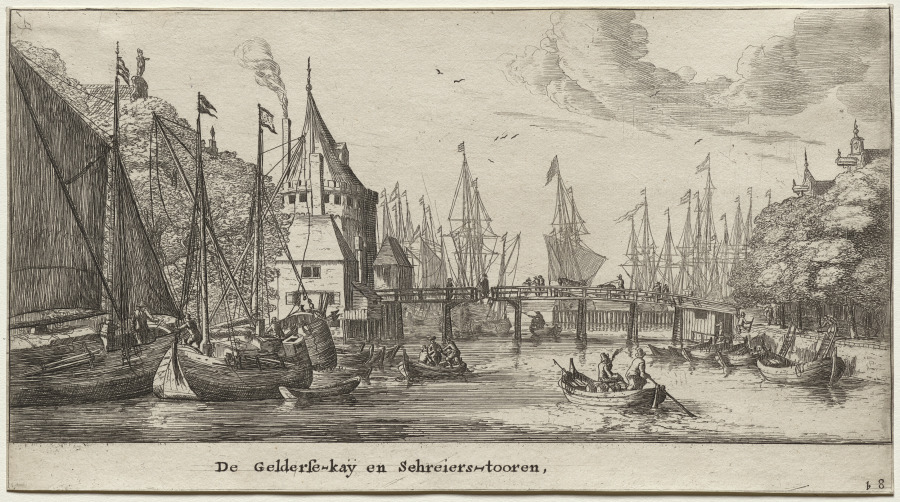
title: Various Ships and Views of Amsterdam (Verscheÿde Schepen en Gesichten van Amstelredam), Part II: The Geldersche Quai and Schreiers Tower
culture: Netherlands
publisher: Clement de Jonghe (Dutch, 1579–1679)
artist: Reinier Nooms, called Zeeman (Dutch, c. 1623–1664)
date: 1652–54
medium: etching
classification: Print